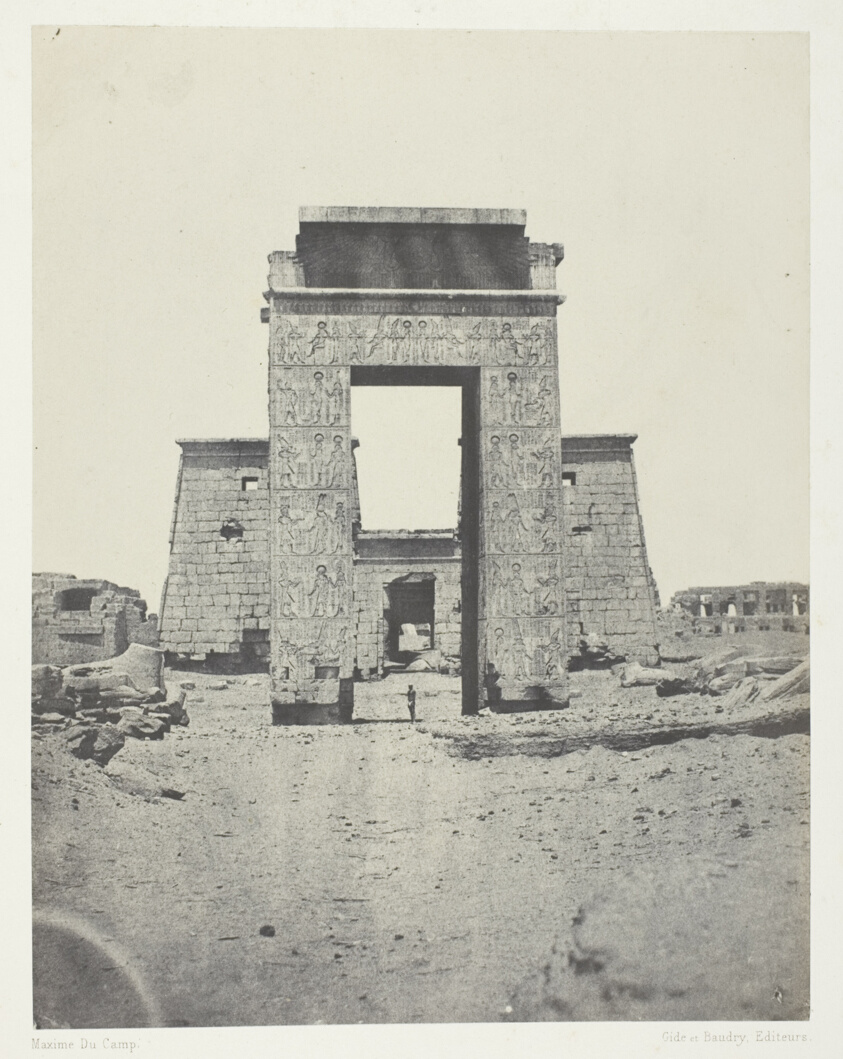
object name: Photograph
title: Karnak, Propylone du Temple de Khons; Thèbes, plate 27 from the album "Egypte, Nubie, Palestine et Syrie" (1852)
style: 19th century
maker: Maxime Du Camp (French, 1822–1894)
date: 1849/51, printed 1852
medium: Salted paper print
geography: France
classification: salted paper print; photographic process; photography; photograph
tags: Collected by Hugh Edwards, Egypte, Nubie, Palestine et Syrie